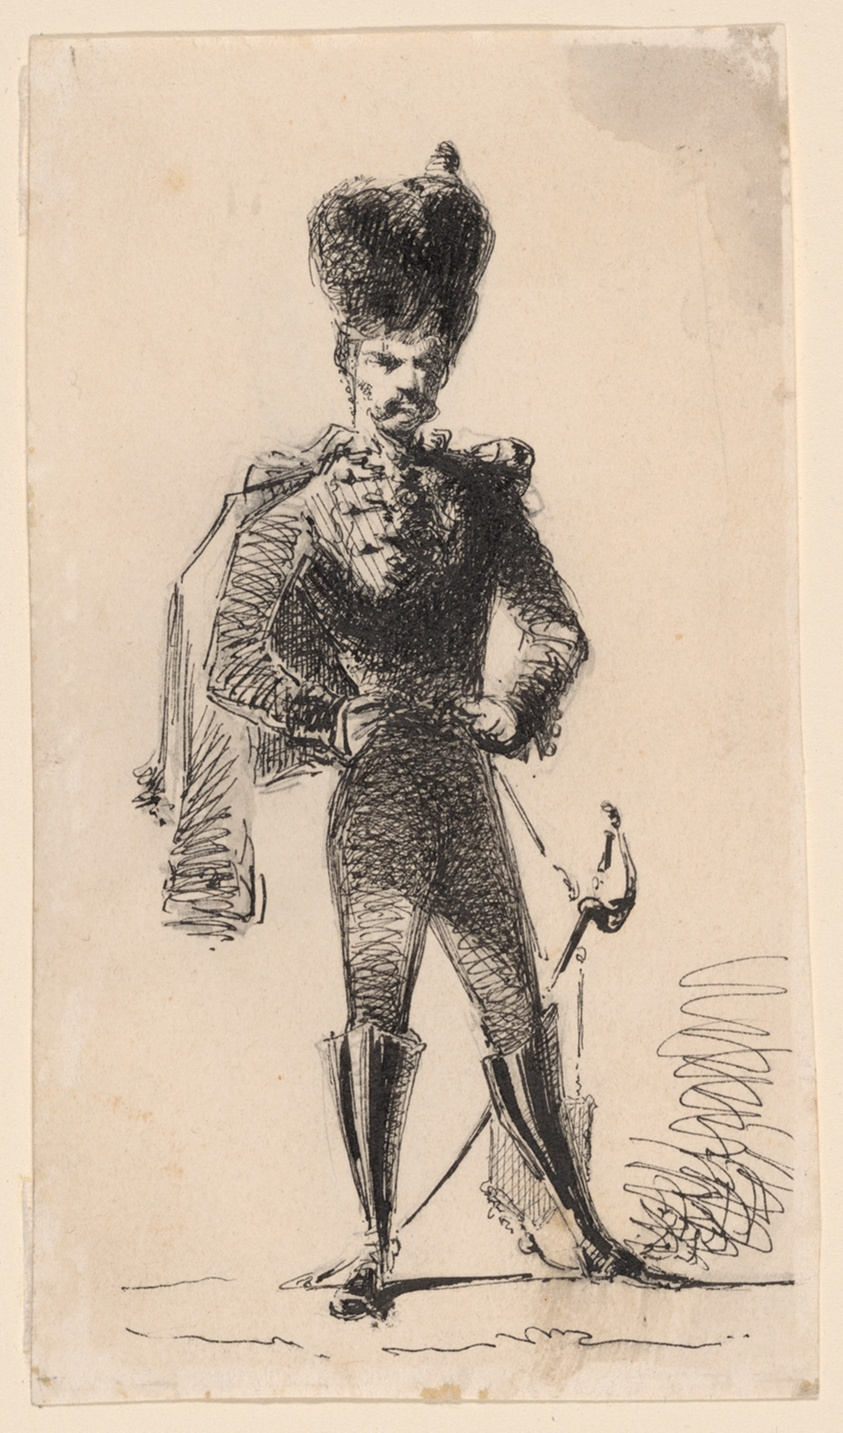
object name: Drawing and Watercolor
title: Hussar (recto) Man with a Top Hat and Bandaged Head (verso)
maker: James McNeill Whistler (American, 1834-1903)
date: 1854/55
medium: Pen and black ink over graphite (recto), and graphite (verso), on cream wove paper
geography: United States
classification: pen and ink drawings; drawings (visual works); prints and drawing; paper